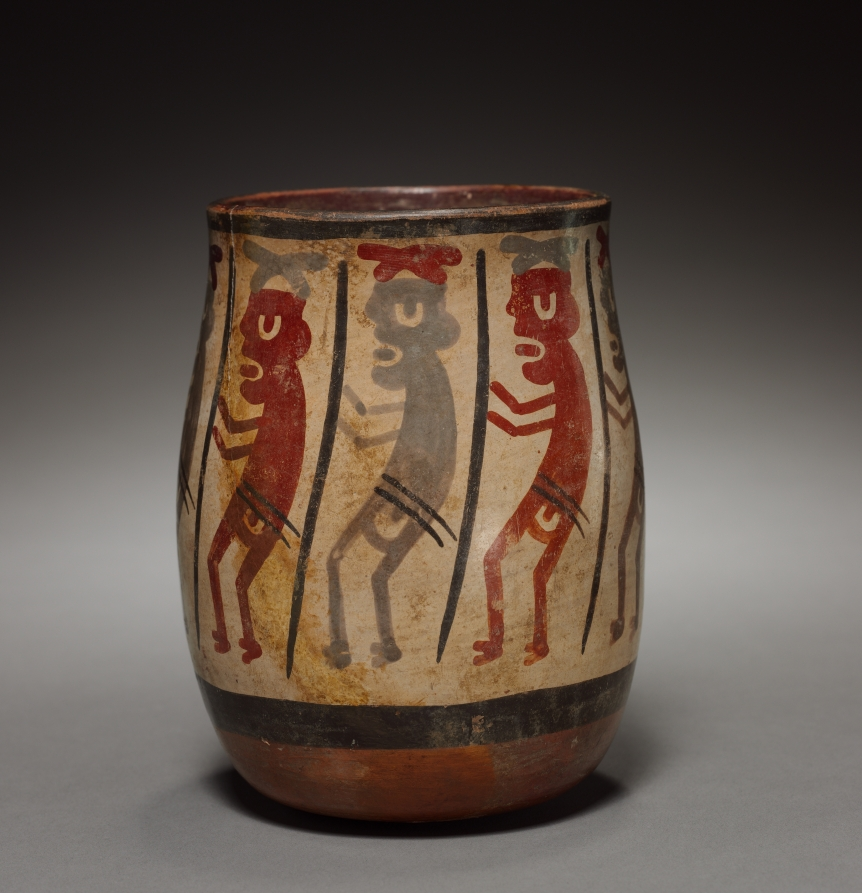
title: Vase with Procession of Warriors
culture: Peru, South Coast, Nasca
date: c. 350–600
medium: earthenware with colored slips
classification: Ceramic